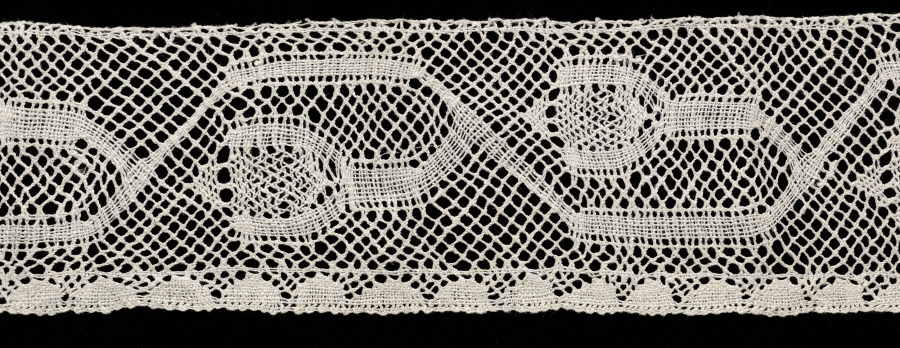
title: Lace Band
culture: Spain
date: 1800s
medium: Bobbin lace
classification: Lace